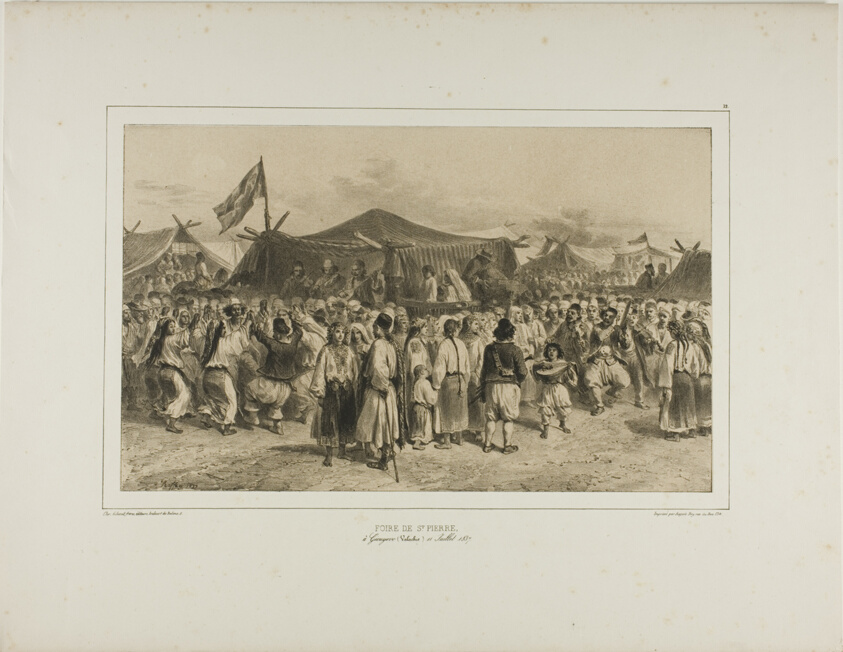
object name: Print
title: St. Pierre fair, Giourjevo, Wallachia, July 11, 1837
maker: Denis Auguste Marie Raffet (French, 1804-1860); printed by Auguste Bry (French, 19th century); published by Chez Gihaut Frères (French, 19th century)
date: 1839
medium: Lithograph in black on tan wove chine laid down on ivory wove paper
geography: France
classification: lithograph; print; prints and drawing